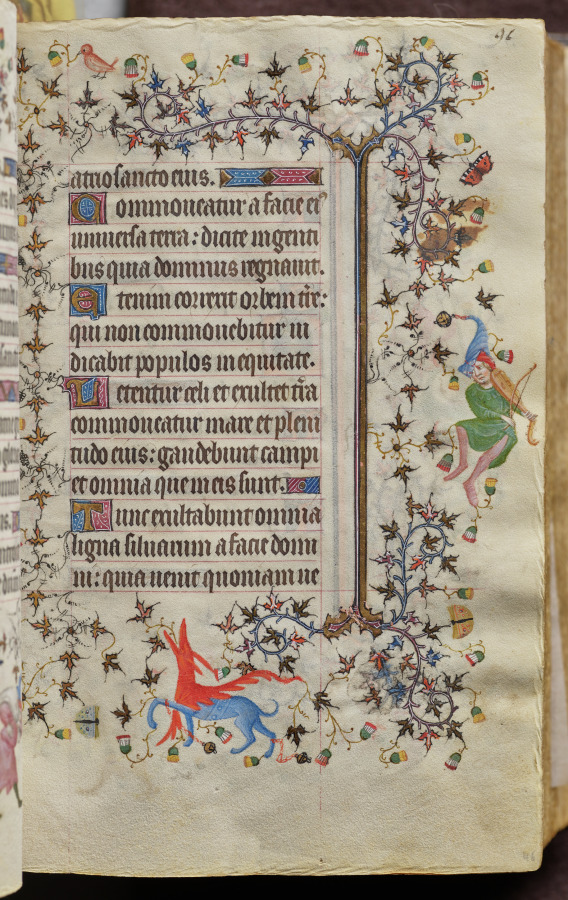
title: Hours of Charles the Noble, King of Navarre (1361-1425): fol. 46r, Text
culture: France, Paris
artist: Master of the Brussels Initials and Associates (French)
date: c. 1405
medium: ink, tempera, and gold on vellum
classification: Bound Volume